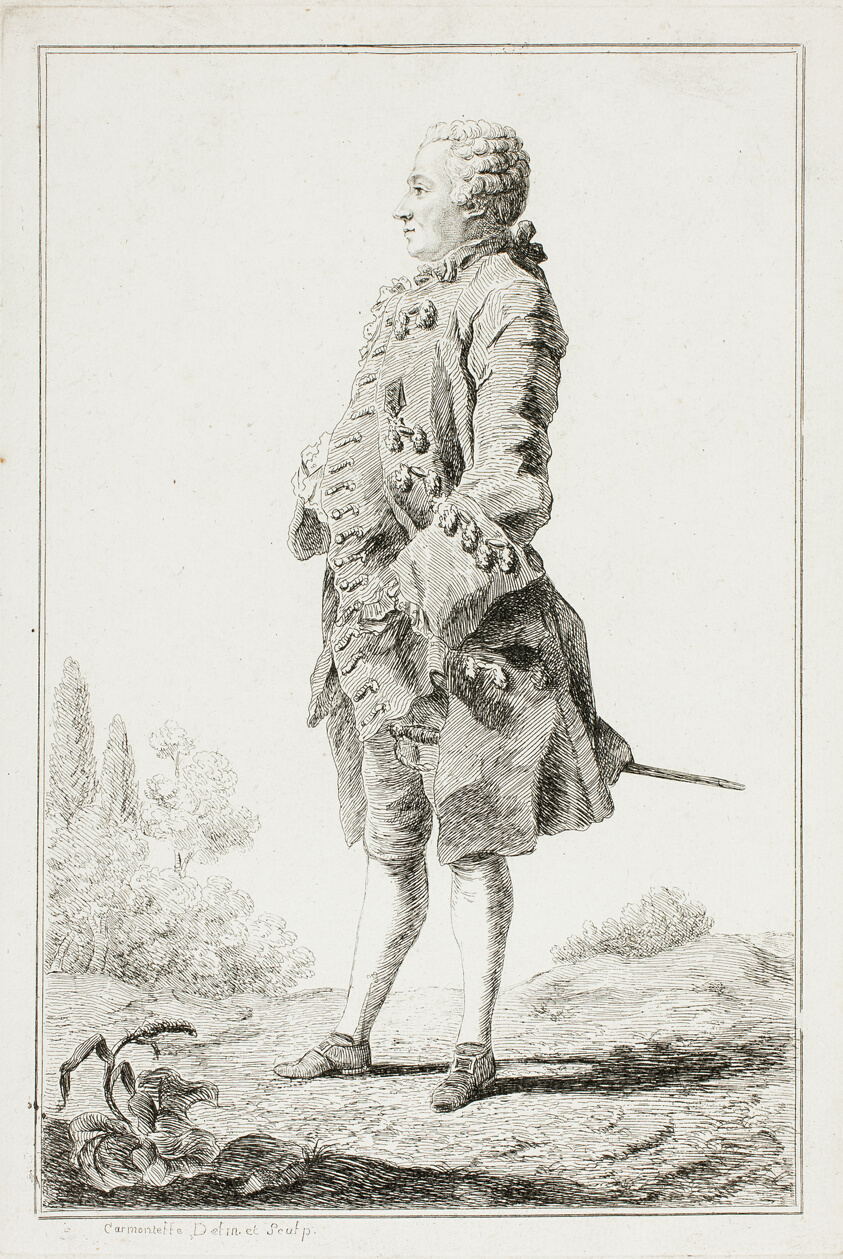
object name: Print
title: The Baron of Besenval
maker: Louis Carrogis de Carmontelle; French, 1717-1806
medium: Etching on paper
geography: France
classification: etching; print; prints and drawing